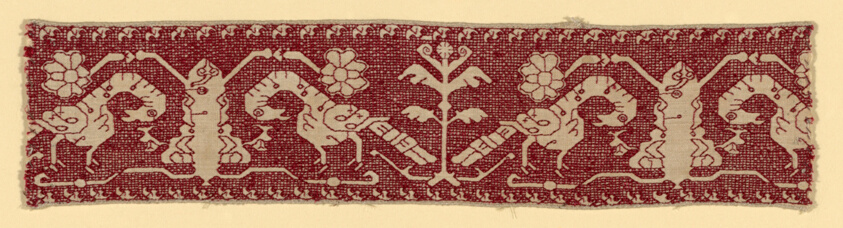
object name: Textile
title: Fragment from a Border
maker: Italy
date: 17th century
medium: Linen, plain weave; embroidered with silk floss in double running and back stitches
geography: Italy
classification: textile; needlework (visual works)